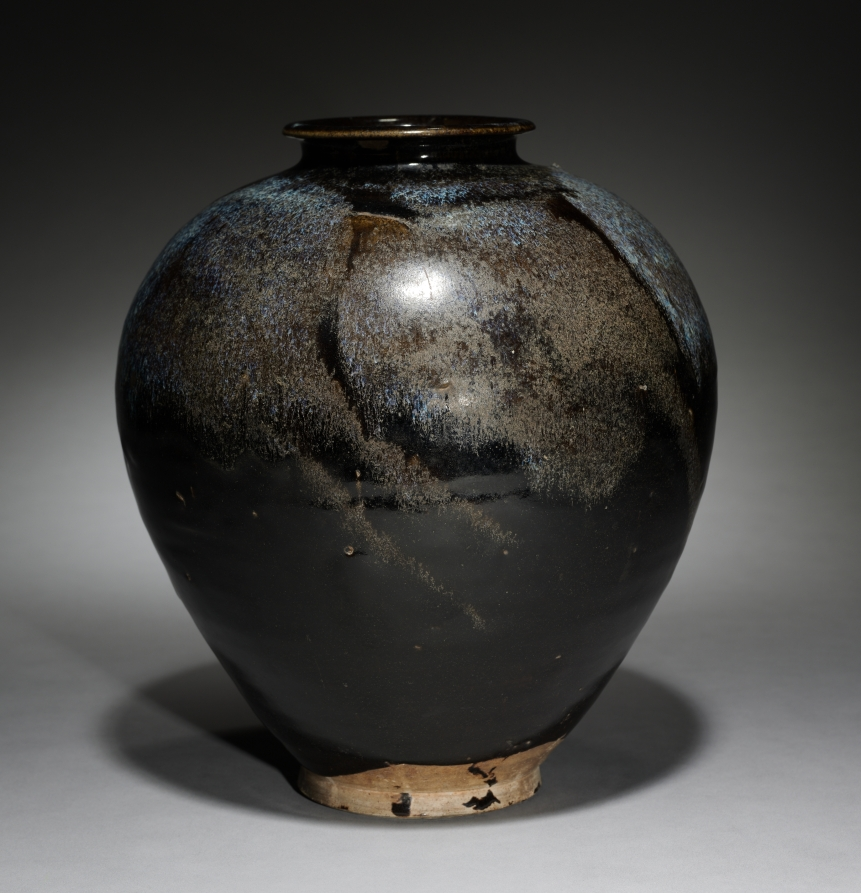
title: Jar: Black Ware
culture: China, Henan province, Huangdao kilns, Tang dynasty (618-907)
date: 700s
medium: glazed stoneware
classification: Ceramic